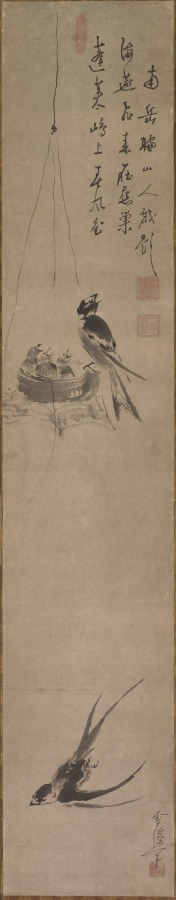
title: Swallows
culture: Japan, Edo period (1615–1868)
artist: Yamaguchi Sekkei (Japanese, 1644–1732)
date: late 1600s–early 1700s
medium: hanging scroll; ink and color on paper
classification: Painting